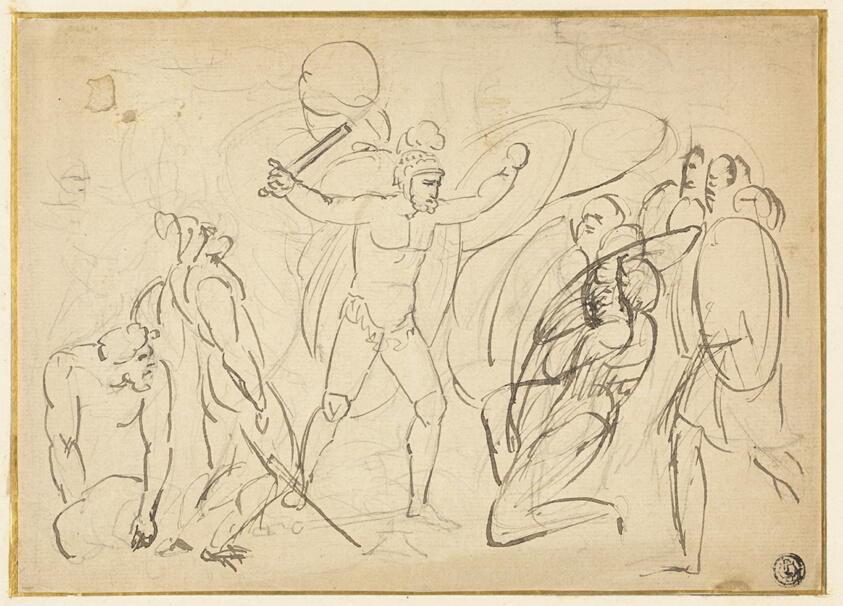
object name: Drawing and Watercolor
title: Classical Combat (recto); Sketch of Male Nude (verso)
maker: Possibly William Blake (English, 1757-1827); or Thomas Stothard (English, 1755-1834)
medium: Pen and black ink over graphite (recto), and graphite (verso), on tan laid paper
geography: England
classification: pen and ink drawings; drawings (visual works); prints and drawing